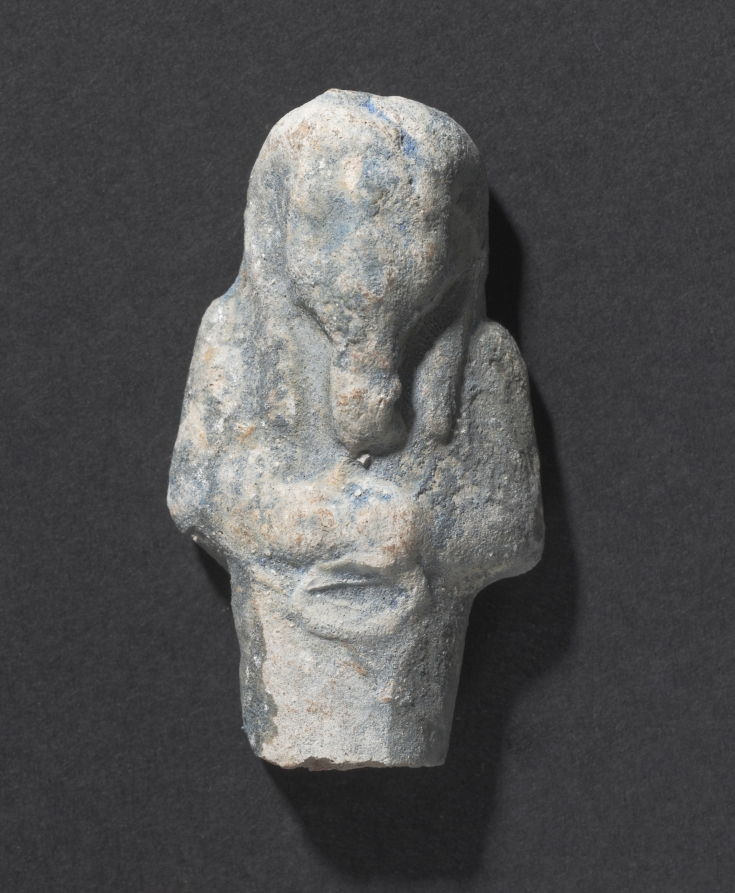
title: Shawabty of Ditamenpaankh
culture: Egypt, Late period (715–332 BCE), Dynasty 25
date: 715–656 BCE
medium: terracotta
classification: Funerary Equipment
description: High demand for shawabtys in the Late Period, a time when as many as 400 or more shawabtys were placed in the tomb with the deceased, gave rise to a specialized container for storing them: the shawabty box. This example is inscribed for the lady of the house, Ditamenpaankh, and was probably one of a pair originally made for her. The single-masted boat on the box's lid is perhaps an allusion to the pilgrimage of the deceased to the holy city of Abydos, the cult city of Osiris, king of the dead. The shawabtys inside are crude, mass-produced examples cast in an open mold. Made of terracotta, their blue paint imitates more costly shawabtys made of faience. As for the shawabty spell, it has been removed from its traditional location on the shawabty's front and relocated onto the sides of box, where it needed only to be written once, thus expediting production.